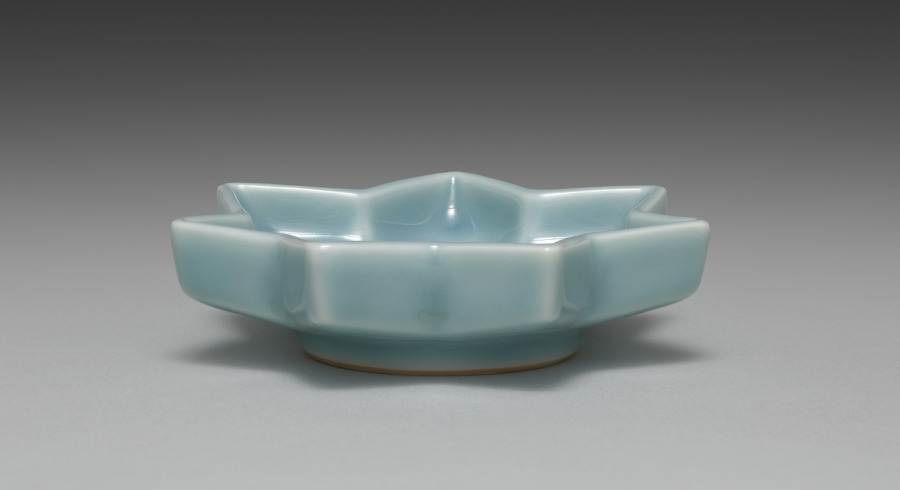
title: Saucer from Maple Leaf-Shaped Saucers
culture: Japan, Meiji period (1868–1912)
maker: Seifū Yohei III (Japanese, 1851–1914)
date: 1893–1914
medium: One of five dishes from a set of ten; porcelain with blue glaze and molded design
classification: Ceramic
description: These maple leaf–shaped saucers, like Yohei III's five shell saucers CMA 2022.188, have a long, horizontal box with a separate compartment for each piece. Now a set of five, these dishes were originally a set of ten, stored in two boxes of five each. From their housings, which accommodate differing numbers of objects, one can hypothesize that while some items created by the Seifu studio were intended to be acquired in larger sets, and thus were perhaps made to order, others, like these, may have been items to be purchased of the shelf in set quantities that allowed clients flexibility in scale. The box for these five saucers describes them as “heavenly blue[–glazed] porcelain” (tenseiji). The veins of the leaves are slightly raised in the clay so that the glaze pools around them and they stand out as white where the glaze thins. There are longer lines at the points of the leaves and shorter ones following the wall of each indentation so that the design has both a horizontal and a subtle vertical dimension.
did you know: Each leaf-shaped saucer in this set has a round foot.